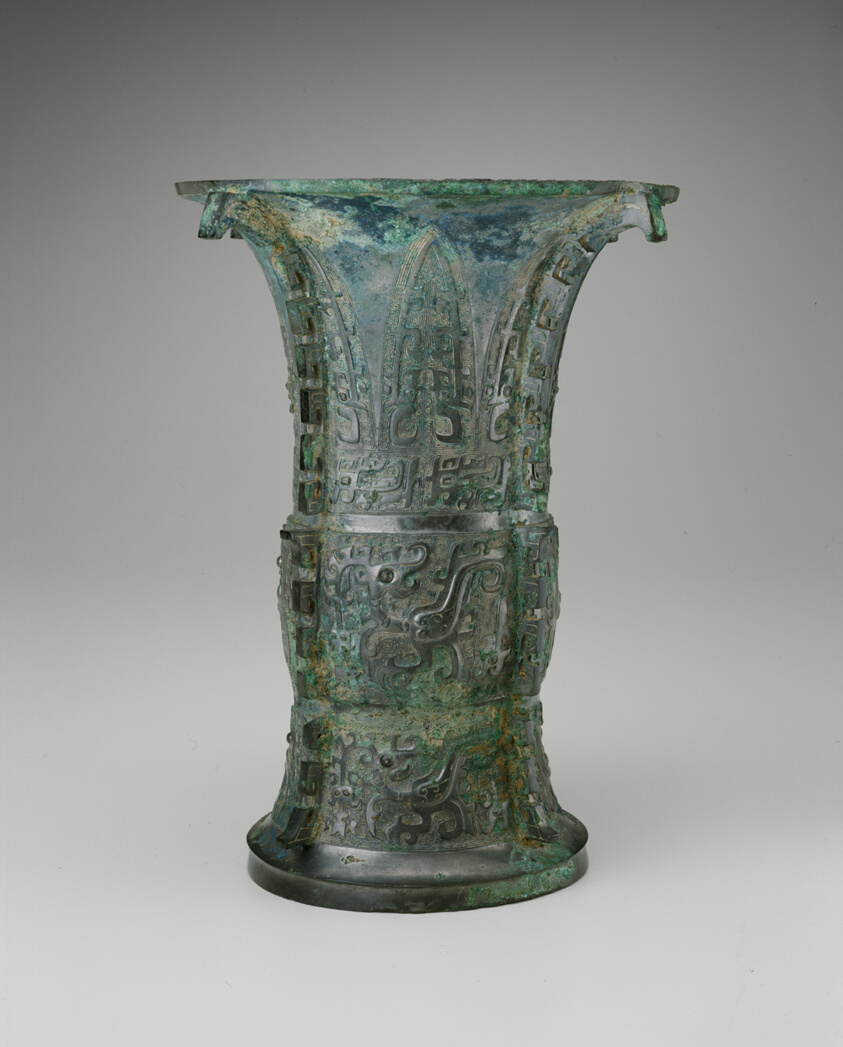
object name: Vessel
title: Wine Container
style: Chinese (culture or style)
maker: China; Shaanxi province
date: Western Zhou dynasty ( 1046771 BC ), late 11th/early 10th century BC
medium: Bronze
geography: China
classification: vessel; bronze; vessel for serving drinks; metal; asian art